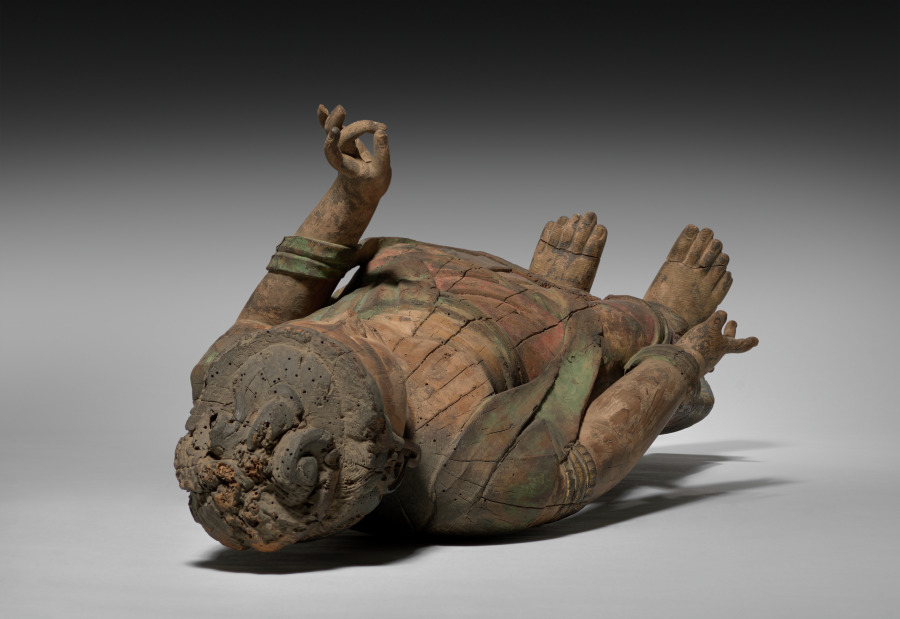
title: Standing Shokannon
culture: Japan, Heian period (794–1185)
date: 900s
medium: carved (single-block) wood with polychromy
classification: Sculpture